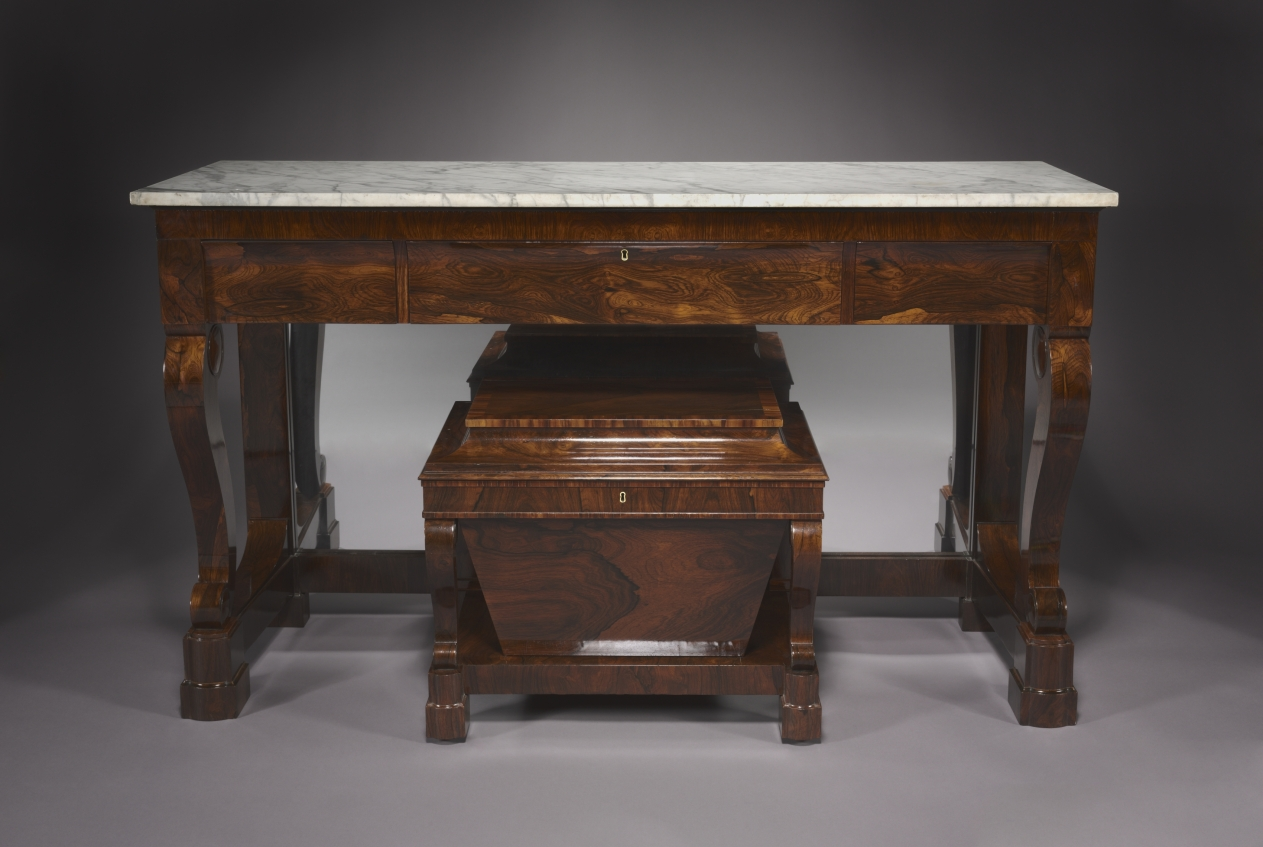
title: Sideboard and Cellarette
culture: America, New York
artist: Duncan Phyfe and Son (American, 1768–1854)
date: c. 1840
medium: chiefly rosewood veneer with pine and poplar secondary woods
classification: Furniture and woodwork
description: This sideboard and cellarette would have graced a 19th-century room. Notice the keyholes on the drawers of both pieces. Expensive silver utensils were stored in the sideboard and wine was kept under lock and key in the cellarette.